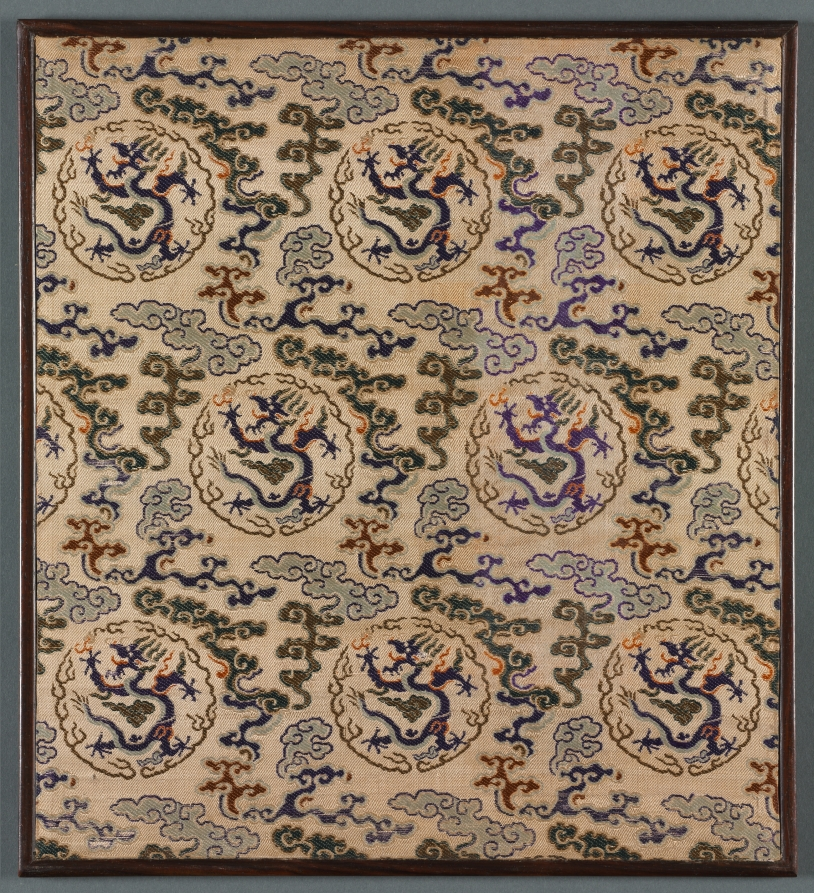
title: Album of Landscapes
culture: China, Qing dynasty (1644–1911)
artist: Wang Gai (Chinese, active c. 1677–1705)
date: 1677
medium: Album of eight leaves; ink or ink and light color on paper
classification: Painting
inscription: Artist's inscription, signature, and seal on leaf 4: In imitation of [T'ang] Wang Hsia's use of ink. Wang Gai of Hsiu-shui [seal] Gai; Artist's poem, signature and seal on leaf 7; Artist's poem, signature, and 2 seals on leaf 8. 8 colophons and 24 additional seals: 1 colophon and 2 seals of Shih Jun-chang (1618-1683); 1 colophon and 3 seals of Wang Shih-chen (1634-1711); 1 colophon and 2 seals of Li Lai-t'ai (dates unknown); 1 colophon and 3 seals of Mi Han-wen (1661 'chin-shih'); 1 colophon and 3 seals of Tai Wang-chin (17th c.); 2 colophons and 6 seals of Tai Wang-lun (1655 'chin-shih'); 1 colophon and 2 seals of Wang Wan (1624-1690); 1 seal of Chang Yin-huan (1837-1900); 2 seals unidentified. Artist's inscription, signature, and seal on leaf E: In imitation of [T'ang] Wang Hsia's use of ink. Wang Kai of Hsiu-shui [seal] Kai. Artist's poem, signature, and seal on leaf G: At an empty window sucking on a brush, the autumn water nearby, Green are the rushes, and bamboo reach to the sky. For those who love hibiscus, river moonlight is best; In this tiny shelter I keep company with sleeping egrets. Wang Kai [seal] Wang yin Kai. Artist's poem, signature, and 2 seals on leaf H: The waters of the Hsün-yang River flow around the town [Chiu-chiang in Chianghsi Province]; Yü Liang [Western Chin Dynasty general and statesman] once made a night excursion here. The air was fresh and cool - it must have been the eighth month; That noble gathering would still be known a thousand years thereafter. In the tantalizing ways we feast there is no difference, past or present, Lofty and pre-eminent talent still overflows in the exchange of verses, Tall and large pavilions all share in good writing. Joy winging through the air is no less than that in the Southern Tower. [The Southern Tower, in Nanch'ang, Hupei Province, was where Yü Liang spent an evening with friends and contemporaries exchanging poetry and ideas.] In the mid-autumn of the ting-ssu year [1677], these paintings and comments are presented to the venerable MengWeng, leader of the literary circle, for criticism. Wang Kai of Hsiu-shui [seals] Wang yin Kai; An-chieh. 8 colophons and 24 additional seals: 1 colophon and 2 seals of Shih Jun-chang (1618-1683); 1 colophon and 3 seals of Wang Shih-chen (1634-1711); 1 colophon and 2 seals of Li Lai-t'ai (dates unknown); 1 colophon and 3 seals of Mi Han-wen (1661 chin-shih); 1 colophon and 3 seals of Tai Wang-chin (17th c.); 2 colophons and 6 seals of Tai Wang-lun (1655 chin-shih); 1 colophon and 2 seals of Wang Wan (1624-1690); 1 seal of Chang Ym-huan (1837-1900); 2 seals unidentified. A. Poem by Shih Jun-chang: Trees enmeshed in clouds darken the river ferry; So grand a scene could only belong to the season of late spring. Looking upon the Five Lakes, fishermen are few, You don't know who the oarsman is. Random comment for the venerable Meng Chih-weng to correct. Shih Jun-chang. B. Poem by Wang Shih-chen: A valley stream winds around a hermit's home, Over dark bamboo and yellow reeds leans one corner of the house. Watching the wake of a fishing boat off somewhere, The ripples in the water are like wild geese nesting in the sand. Inscribed for Meng Weng by his junior, Wang Shih-chen. C. Poem by Li Lai-t'ai: A small bridge merged with clouds crosses the distant water, A few rosy clouds and autumn colors trim the clear river. I stand alone at leisure in empty mists; The mountains' verdant sides and misty peaks face the small window. Inscribed for venerable Mr. Meng Weng, Li Lai-t'ao. D. Poem by Mi Han-wen: Coming and going time after time, The front pavilion rests upon a great river. Distant sails, the spring waters broad, A tall temple, the afternoon sun strong. Beneath the shadow of a butterfly, red peonies, Amidst the chatter of birds, green vines. Unable yet to return to the old mountains, In vain I hum the "Picking ling-chih" song. Written for Meng Lao, Mi Han-wen. [The last two lines refer to the Four Old Recluses of Mount Shang who lived during the Ch'in Dynasty [221-206 BC], and the song they sang about picking ling-chih, the mushroom-like growth thought to produce immortality.] E. Poem by Tai Wang-chin: Who picks up his unrestrained brush to write down misty peaks? To gaze at mountains from an empty house is a pleasure inexhaustible. I even wish I were physically within a painting. Where floating clouds are not depicted, but only a vast sea of waves. Written for the comments of Mr. Meng Weng, your junior associate, Tai Wang-chin. F. Poem by Tai Wang-lun: Splashed ink, dripping wet, cannot be restrained Smartweed flowers are boundless, the water flowing long. The old fisherman moves his oar leisurely back and forth, In ten thousand valleys and a thousand peaks, the air is filled with fall. Written on one of the paintings for the venerable Meng Weng, Tai Wang-lun of Ts'ang-chou. G. Poem by Tai Wang-lun: Precipitous slopes, distant peaks, and trees with forking branches, Set apart are village huts for two or three households. In one of them a recluse expounds from a book on the Tao, Burning incense, alone he sits to chant the Nan-hua [Chuang-tzu]. Written on a second painting for the venerable Meng Ch'i, Tai Wang-lun of Ts'ang-chou. H. Poem by Wang Wan: Clouds like a landslide cover the boundless sky; Year-round howling, the direction of the wind is ominous. The boom has just been lowered with a hundred feet of sail; Yet you can predict the violent wind from the direction of flying pennon tails. Reed blossoms fly in disarray, their leaves badly battered; Yangtze porpoises blow upon the waves, producing wild ripples. You people of the land, don't sing about the joys of the trader, Winds and waves like these will make their journey treacherous. Written for venerable Meng Weng, your junior friend from Yao-fen, Wang Wan. trans. HK/LYSL